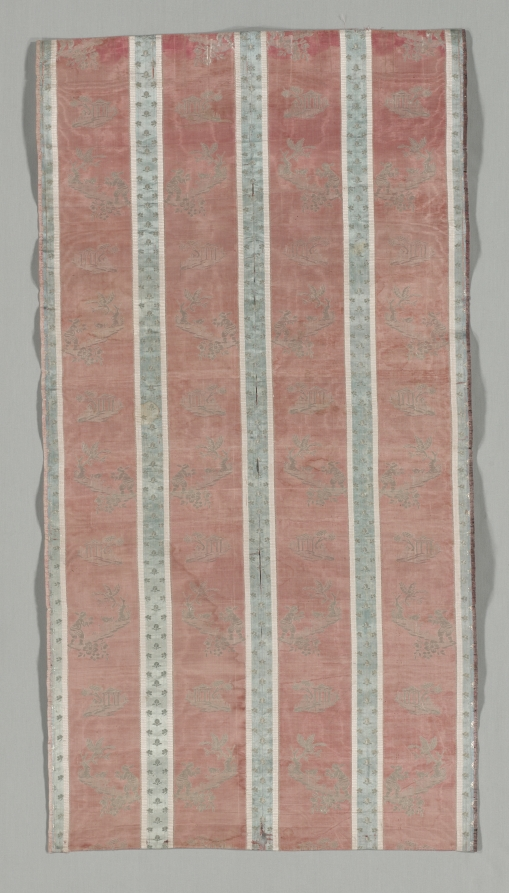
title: Length of Textile with Classical Ruin in a Landscape Design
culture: France, early 19th century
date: early 1800s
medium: silk lampas patterned weave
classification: Textile